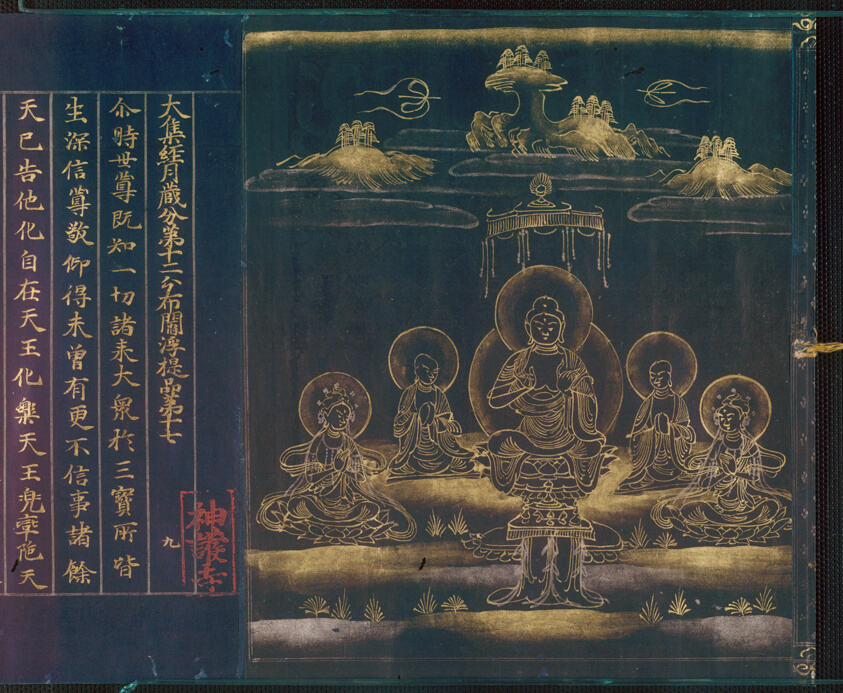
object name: Painting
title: Jingoji Sutra and Wrapper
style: Japanese (culture or style)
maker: Artist unknown; Japanese, active 12th century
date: Late 12th century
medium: Gold and silver pigments on indigo-dyed paper, bamboo, silk, mica, and gilt bronze.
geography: Japan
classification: painting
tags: Buddhism, religion